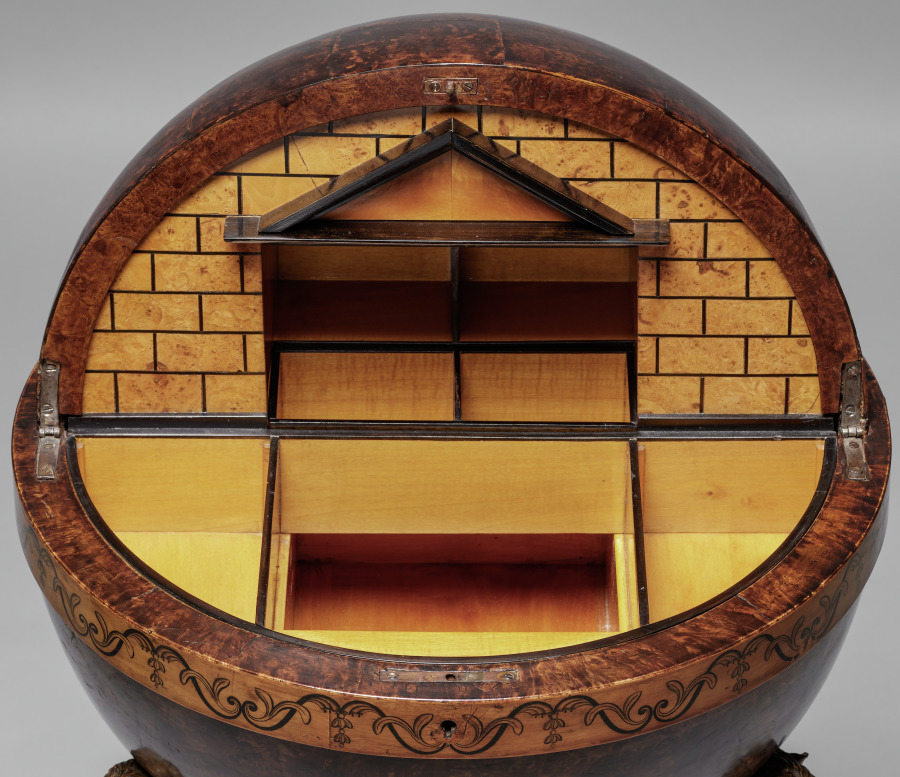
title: Globe Work Table (Globustisch)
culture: Austria, Vienna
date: c. 1810–15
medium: Burl walnut veneer, mahogany, ebony, satinwood, gilt wood, painted wood; mirrored glass; metal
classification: Furniture and woodwork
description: Work tables resembling globes were the usual form for a lady's sewing or writing table around 1800 in Austria. Combining moving parts, secret compartments, and highly finished decoration, these tables were also a way for the cabinetmaker to show off his skill. The tripod supports and temple-like architectural quality of both the exterior and interior decoration reflect the fashionable taste for neoclassical style, or Biedermeier as it was called in Austria, where Vienna was the center of such elaborate furniture production.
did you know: The top half of the globe rotates upward to reveal hidden compartments for sewing tools, threads, and unfinished fabric pieces.